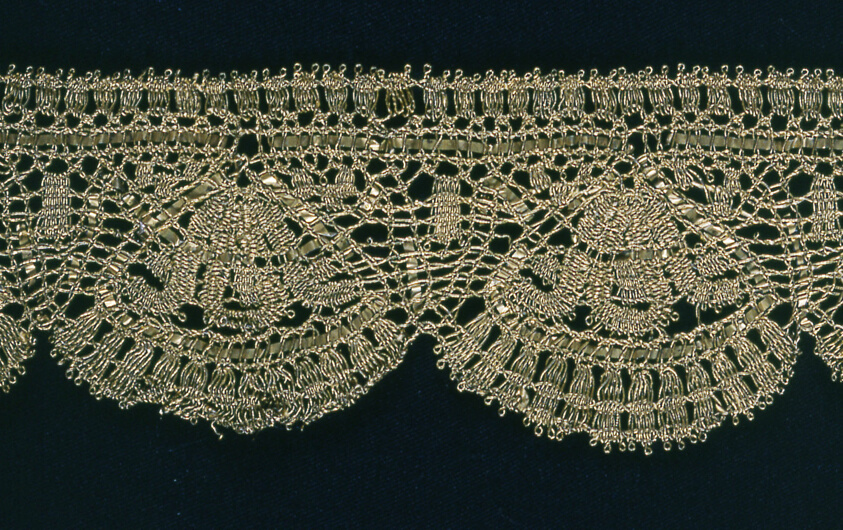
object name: Textile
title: Border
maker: Probably France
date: 1650/1725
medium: Gold-gilted-silver strip and gold-gilted-silver-strip-wrapped silk, bobbin straight lace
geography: France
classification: textile; lace - bobbin; lace